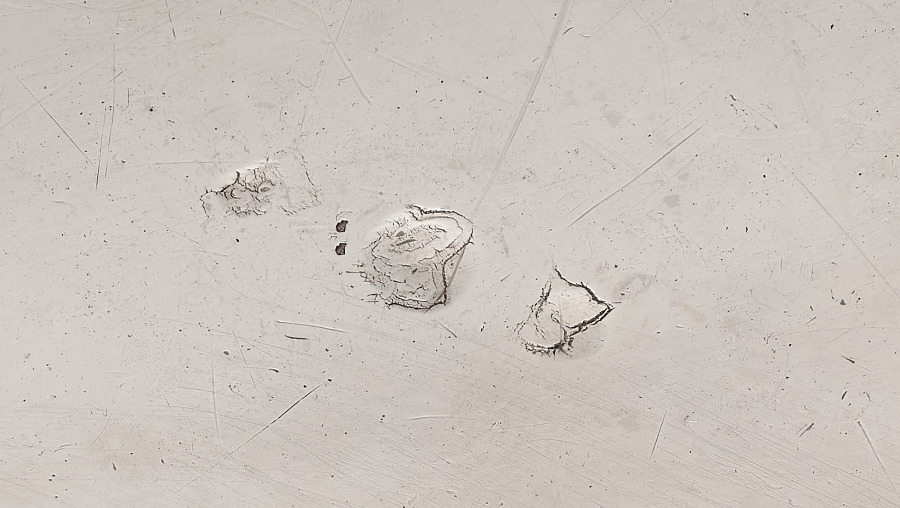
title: Stand for a Covered Tureen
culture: France, Paris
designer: Juste-Aurèle Meissonnier (French, 1695–1750)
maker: Pierre-François Bonnestrenne (French)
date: 1735–38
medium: silver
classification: Silver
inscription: engraved Meissonnier signature.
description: See entry for cover record 1977.182.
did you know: The langoustine, pigeon, and vegetables were cast using real examples giving the silver copies lifelike detail and appearance.